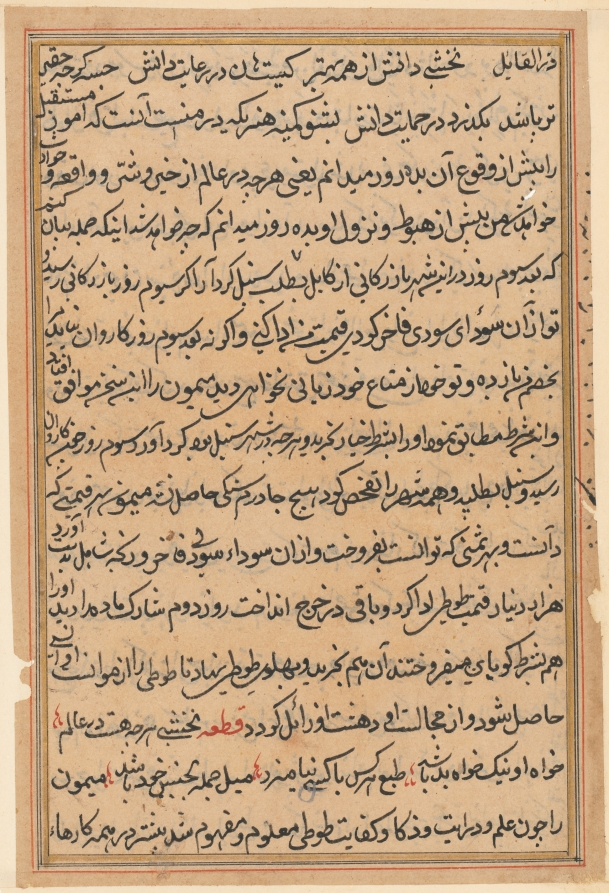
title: Page from Tales of a Parrot (Tuti-nama): text page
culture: Mughal India, court of Akbar (reigned 1556–1605)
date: c. 1560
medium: gum tempera, ink, and gold on paper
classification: Painting